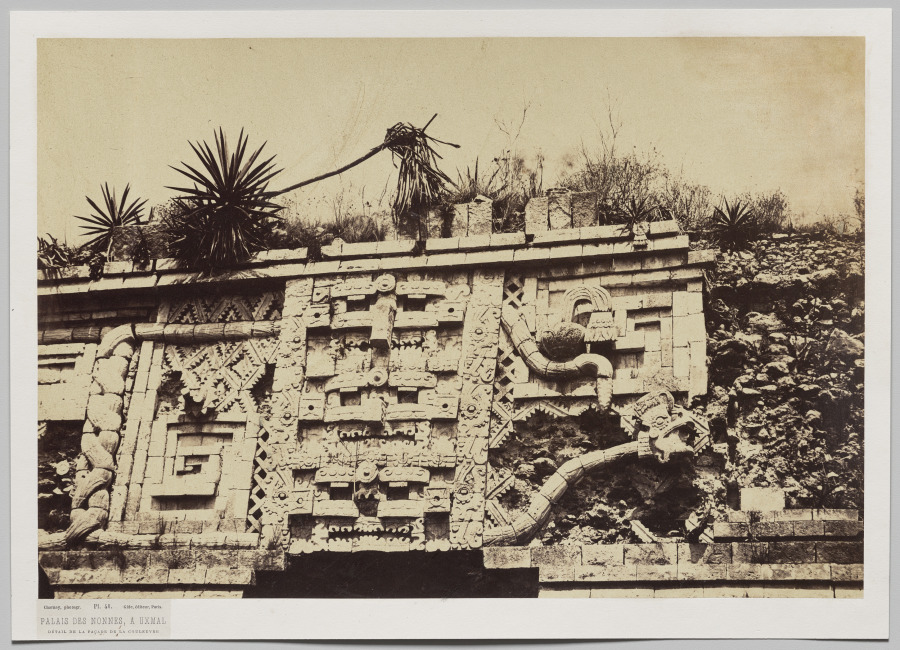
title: Palace of the Nuns at Uxmal (detail from the façade of the snake)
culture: France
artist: Claude-Joseph-Désiré Charnay (French, 1828–1915)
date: c. 1860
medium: albumen print from collodion negative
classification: Photograph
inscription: Imprinted in paper label adhered to recto, lower left: "Charnay, photogr. Pl. 41. Gide, éditeur, Paris./PALAIS DES NONNES, A UXMAL/Détail de la Façade de la Couleuvre"